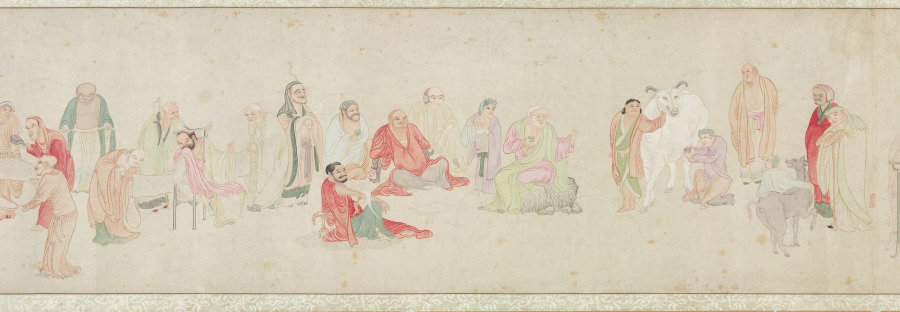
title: The Five Hundred Arhats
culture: China, Ming dynasty (1368–1644)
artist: Wu Bin (Chinese, active c. 1591–1626)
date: 1591–1626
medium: Handscroll; ink and color on paper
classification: Painting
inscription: 枝隱頭陀吳彬齋心拜寫 [印]吳彬之印; 文中父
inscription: 7 seals of Qianlong emperor (r. 1736–95): Gu xi tian zi 古希天子; Shou 壽; Qianlong jian shang 乾隆鑑賞; San xi tang jing jian xi 三希堂精鑑璽; Yi zi sun 宜子孫; Tai shang huang di zhi bao 太上皇帝之寳; Qian qing gong bao 乾清宮寶.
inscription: 6 seals of Cheng Qi 程琦 (1911–1988): Ke an geng zi wu shi yi hou suo de ming ji 可菴庚子五十以後所得名跡; 5 other Cheng Qi seals.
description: More than 66 feet long, this handscroll depicts 447 luohans, 72 attendants, and the bodhisattva of compassion at its very end. Luohans (arhats in Sanskrit), disciples of the Buddha and protectors of the Buddha’s law, possess supernatural powers and take on myriad external appearances. The amusing assortment of characters are engaged in an array of religious, secular, and miraculous activities. The painter used stylistic features borrowed from earlier artists, carefully controlled lines, and refined coloring. Wu Bin was a lay Buddhist and depicting this sort of image was part of a religious practice seeking understanding of the Buddha’s teaching.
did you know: Far advanced on the path to enlightenment, arhats have the capacity to tame tigers, free dragons, and to float on water or in the air.